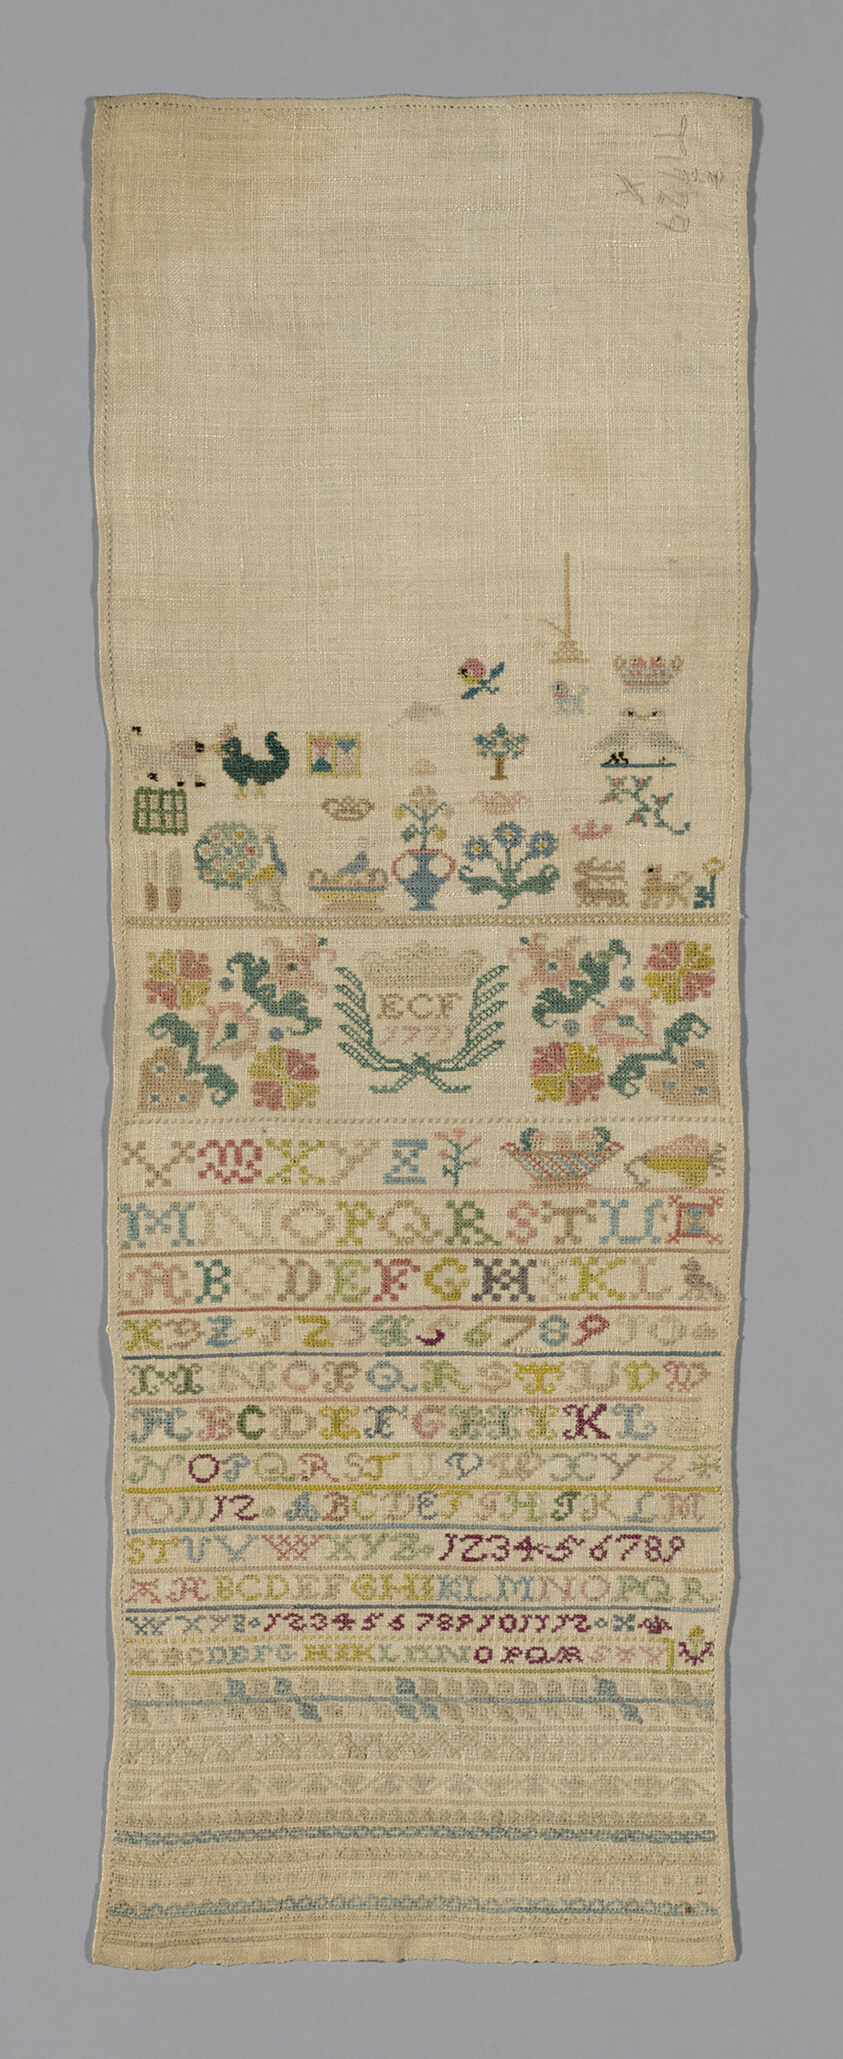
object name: Textile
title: Sampler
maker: Germany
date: 1771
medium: Linen, plain weave; embroidered with silk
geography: Germany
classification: textile; sampler; needlework (visual works)